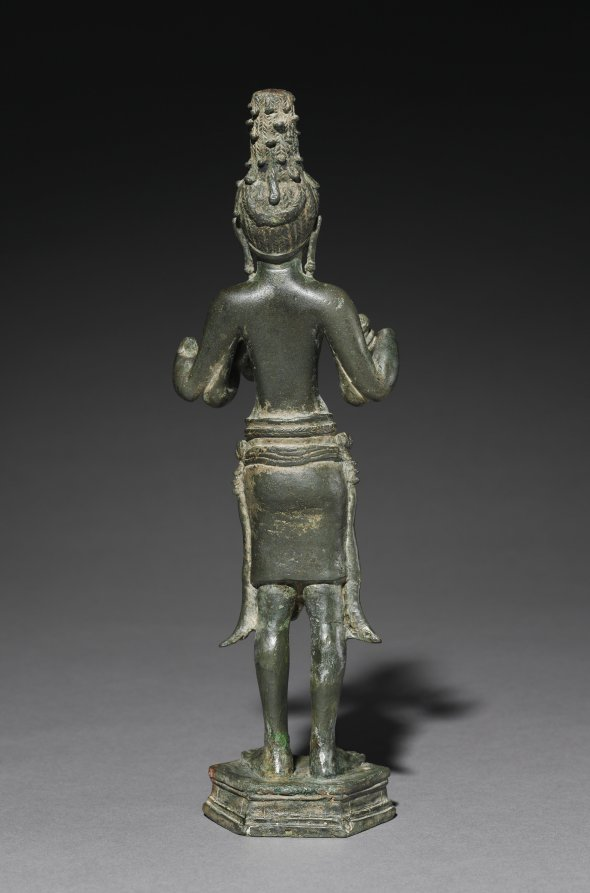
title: Maitreya: The Buddha of the Future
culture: Cambodia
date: 600s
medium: bronze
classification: Sculpture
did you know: The slender fingers of the left hand hold a water pot while the right hand is in the gesture of the vitarka mudra, a gesture of explanation and exposition.